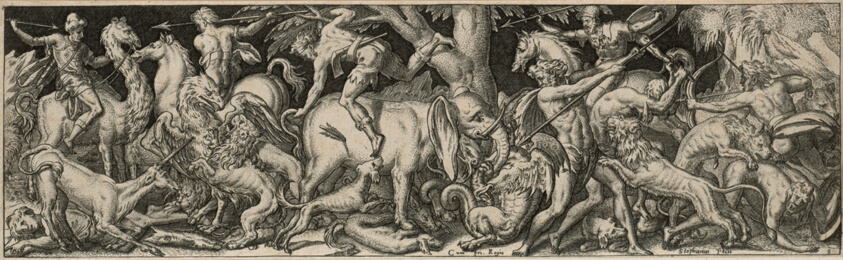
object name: Print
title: Combat of Men and Animals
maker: Etienne Delaune; French, c. 1519-1583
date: 1550/1572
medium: Engraving on paper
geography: France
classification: engraving; print; prints and drawing